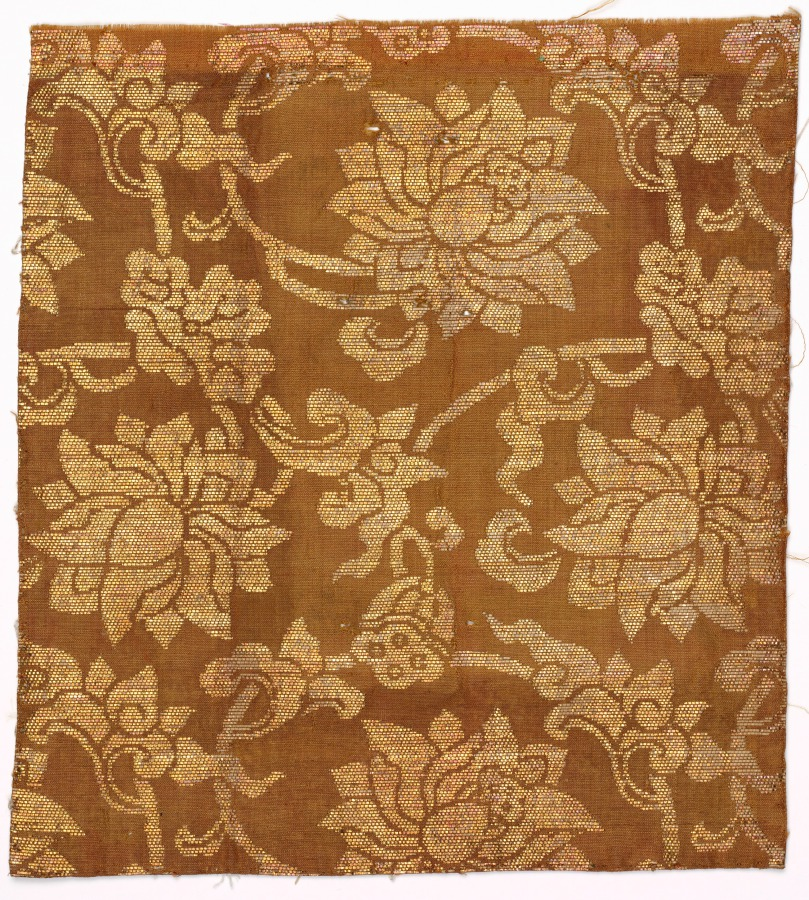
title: Textile Fragment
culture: Japan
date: 1800s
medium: silk, metallic thread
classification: Textile